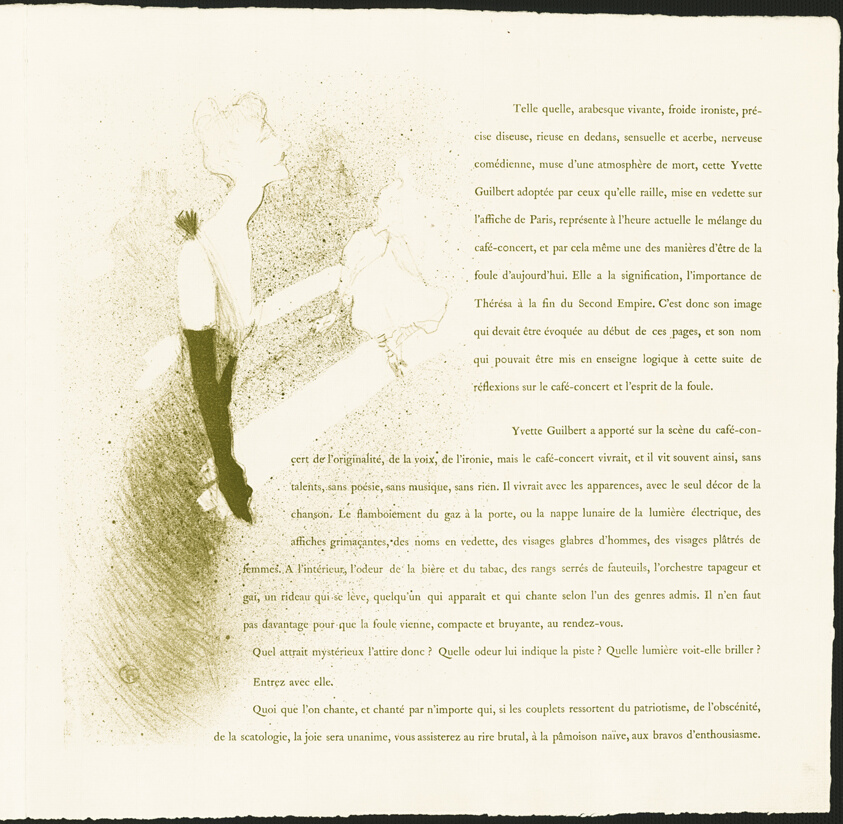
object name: Print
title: Yvette Guilbert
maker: Henri de Toulouse-Lautrec (French, 1864-1901)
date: 1894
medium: Color lithograph, with letterpress, on ivory wove paper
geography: France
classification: lithograph; print; prints and drawing